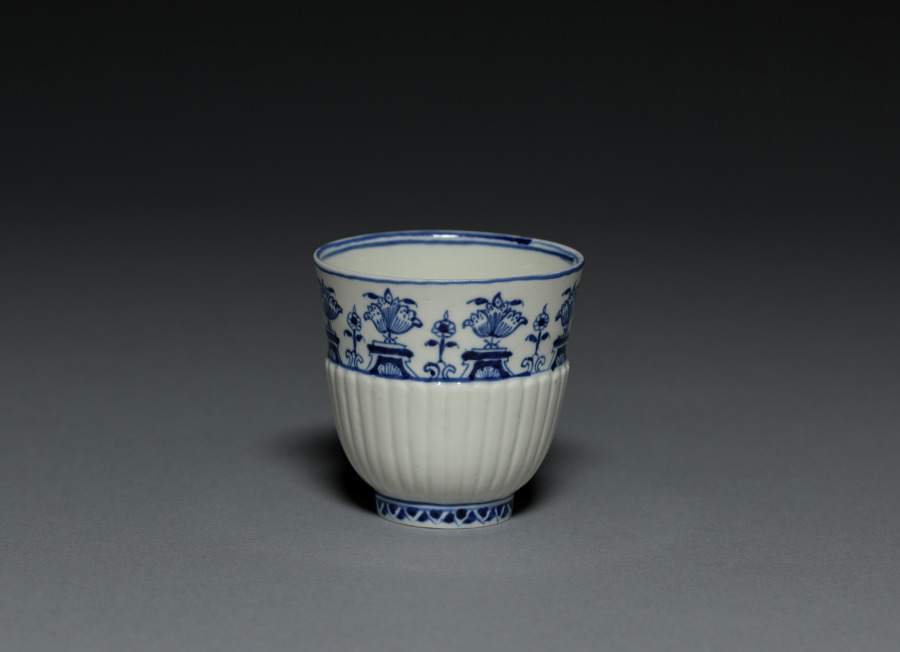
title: Cup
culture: France, Saint Cloud, 18th century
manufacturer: Saint Cloud Porcelain Factory (French)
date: c. 1720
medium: soft-paste porcelain with underglaze blue decoration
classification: Ceramic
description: The first extensive manufactory of soft-paste porcelain in France was carried out at a factory at Saint-Cloud, near Paris. The earliest porcelains were produced there in 1693, and the factory remained a significant one throughout the first half of the 18th century. Bacause of technical difficulties, most of the wares produced at Saint-Cloud are rather small in size and heavily potted. Stylistic restraint was exercised in both the form and decoration of its wares. Underglaze blue was frequently employed at Saint-Cloud, and pieces of the type resemble closely those attributed to Rouen, leading to the speculation that the two factories were closely related.